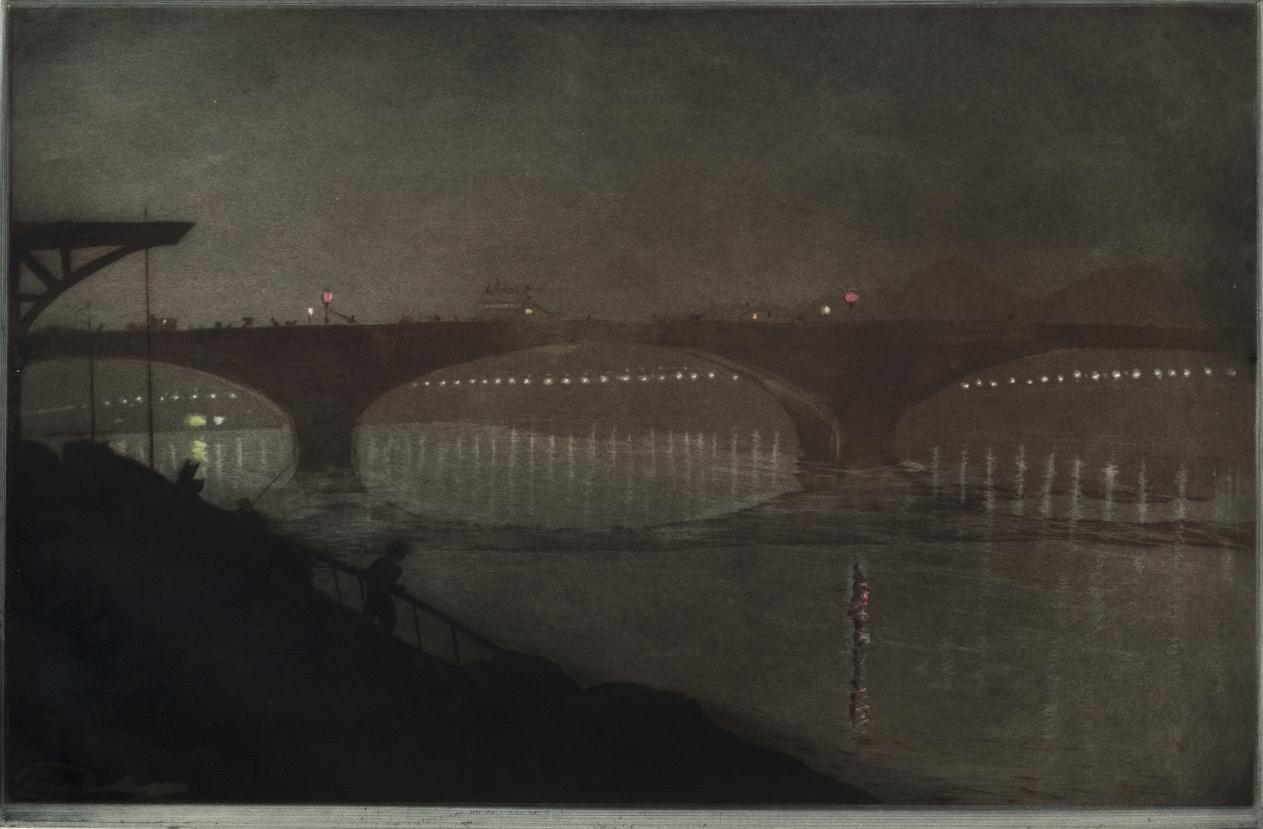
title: The Solferino Bridge: Nocturnal Effect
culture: France, 19th century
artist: Eugène Delâtre (French, 1864–1938)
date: c.1898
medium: color aquatint and etching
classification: Print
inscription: lower left, in blue pencil: 48/50; right: Eug Delatre; lower edge, in graphite: Le Pont Solferino